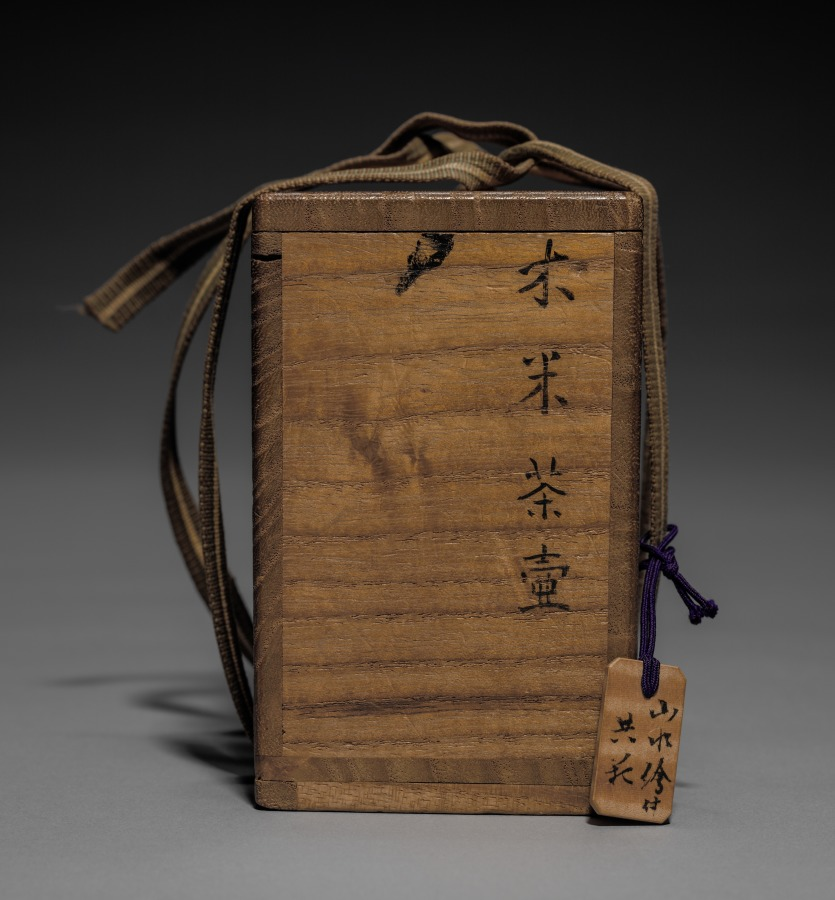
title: Pair of Tea Containers with Plum Blossoms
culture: Japan, Edo period (1615–1868)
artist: Aoki Mokubei (Japanese, 1767–1833)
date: early 1800s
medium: porcelain with underglaze blue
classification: Ceramic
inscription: signed "Ro Mokubei" on base in underglaze blue.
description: Aoki Mokubei, born into a family of restaurateurs, was a potter, calligrapher, painter, and scholar, and is considered one of the three masters of later Edo period Kyoto ceramics. He specialized in porcelains fashioned after Chinese prototypes, and created works for steeped tea (sencha) such as these matching tea caddies decorated in an underglaze blue called sometsuke—literally “with applied dye.” He signed them on their bottoms. They also have intricately patterned silk sleeves to both beautify and protect them. On the exterior of the lid of the outer wooden box that contains them, it is written that Mokubei inscribed and painted an image on the box. On the interior of the lid, the signature and seals of a former owner are written. Mokubei has signed the lid of the inner box, and a charming ink and light color composition of West Lake in Hangzhou in China covers its three sides. On the fourth side is a long inscription by Mokubei describing the scene.